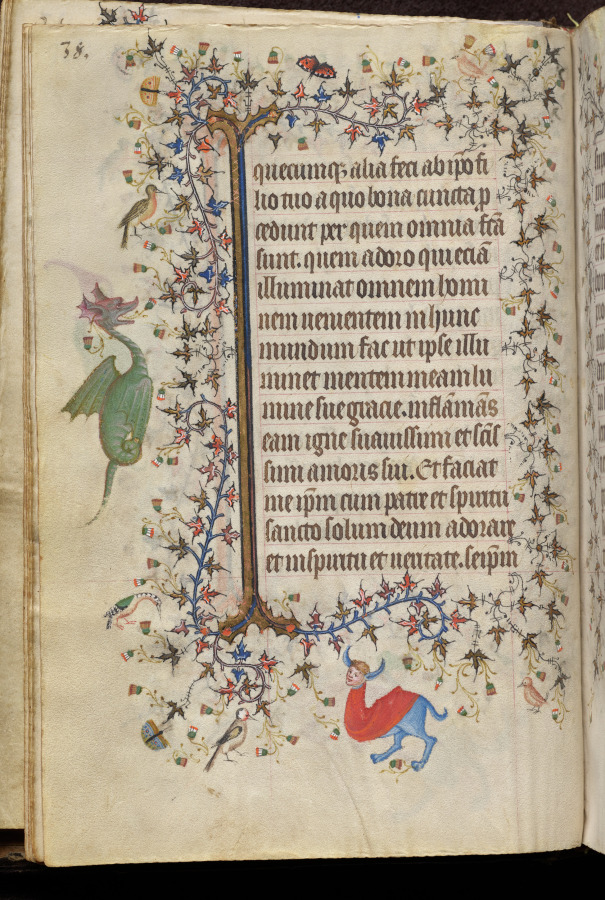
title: Hours of Charles the Noble, King of Navarre (1361-1425): fol. 19v, Text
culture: France, Paris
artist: Master of the Brussels Initials and Associates (French)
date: c. 1405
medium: ink, tempera, and gold on vellum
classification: Bound Volume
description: This precious volume was obviously highly prized by its owner, the French-born King of Navarre, who had his coat of arms painted on no less than twenty folios. Rather than directly commissioning this manuscript from a specific workshop, it seems that Charles the Noble acquired his book of hours -- perhaps ready-made for the luxury market -- while on a trip to Paris in 1404-05. A collaborative effort, six painting styles are evidenced within the pages of this codex, those of two Italians, two Frenchmen, and two Netherlanders. The painter who was responsible for the planning and decoration of the book, and who produced seventeen of the large miniatures, was a Bolognese artist known as the Master of the Brussels Initials. His principal assistant, responsible for most of the borders, was a Florentine who signed his name "Zecho" da Firenze on folio 208 verso.